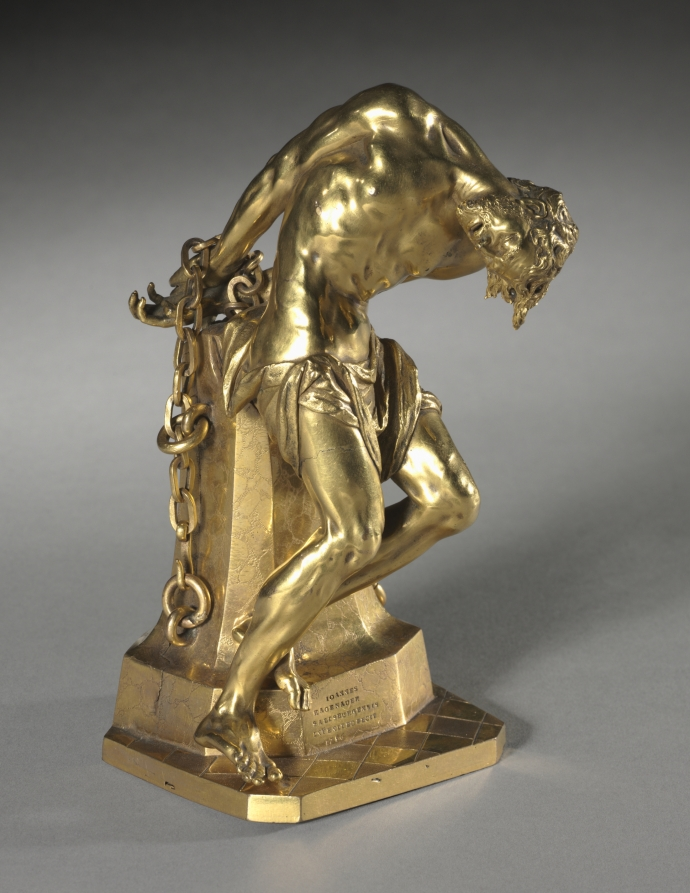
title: Christ at the Column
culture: Austria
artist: Johann Baptist Hagenauer (Austrian, 1732–1810)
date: 1756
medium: gilt bronze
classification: Sculpture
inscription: at base of stake: IOANNES HAGENAUER SALISBURGENSIS INVENIT ED FECIT 1756.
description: Considered to be one of the masterpieces of his youth, Hagenauer cast this bronze while a student at the Vienna Academy, where he studied between 1754 and 1759. The authorship and date is verified by an inscription found at the base of the stake: IOANNES HAGENAUER SALISBURGENSIS INVENIT ED FECIT 1756. This signature appears on several of Hagenauer's early works.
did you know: With the energy of the imbalanced composition, Hagenauer emphasizes this heightened moment of the Passion of Christ.